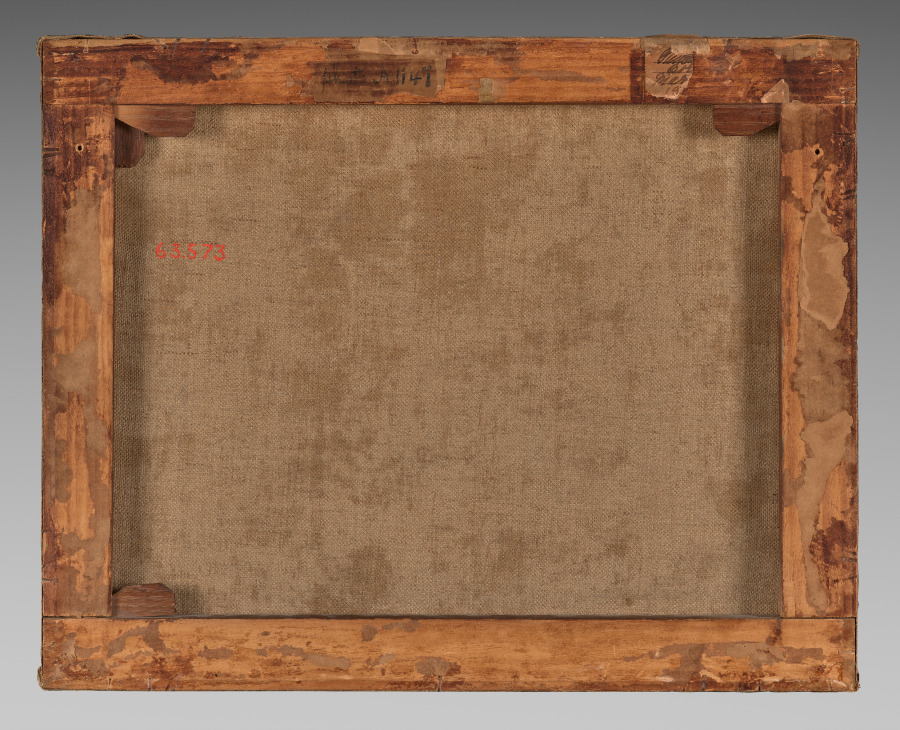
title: The Banks of the Marne at Charenton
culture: France, 19th century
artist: Armand Guillaumin (French, 1841–1927)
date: c. 1895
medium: oil on fabric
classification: Painting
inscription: Signed lower left: Guillaumin